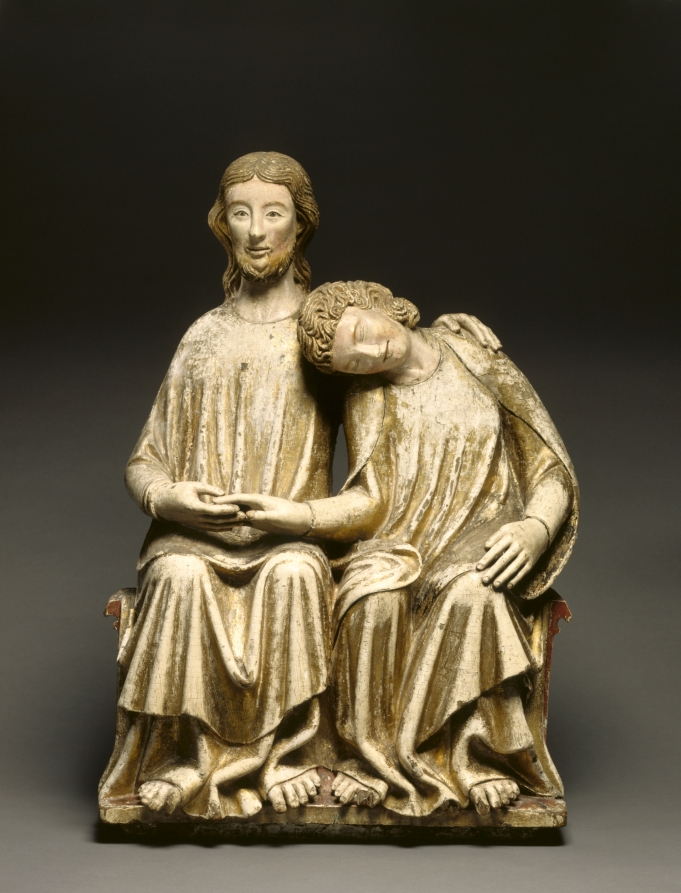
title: Christ and Saint John the Evangelist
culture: Germany, Swabia, near Bodensee (Lake Constance)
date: 1300–1320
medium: polychromed and gilded oak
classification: Sculpture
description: This sculptural group featuring Saint John the Evangelist resting on the shoulder of Christ was a prolific subject in Swabia, the region on the Swiss border. The subject appears to be unique to this region, where it became popular in the years following 1300. Many of these devotional sculptures adorned the chapels of Dominican convents; this is artistically among the finest to survive. It captures the pathos of the moment, based on the Gospel of John (13:23), which states that during the Last Supper one of Christ’s disciples, namely "whom Jesus loved," was resting on his shoulder. As a focus for devotion and contemplation, this sculpture reflects the fundamental religious beliefs rooted in the mysticism that dominated the period. Mysticism was a movement that intended to stimulate the contemplation of Christ’s Passion and suffering. Mysticism encouraged private devotion and religious images, called andachtsbilder (devotional images), appeared in large numbers in late medieval Germany.